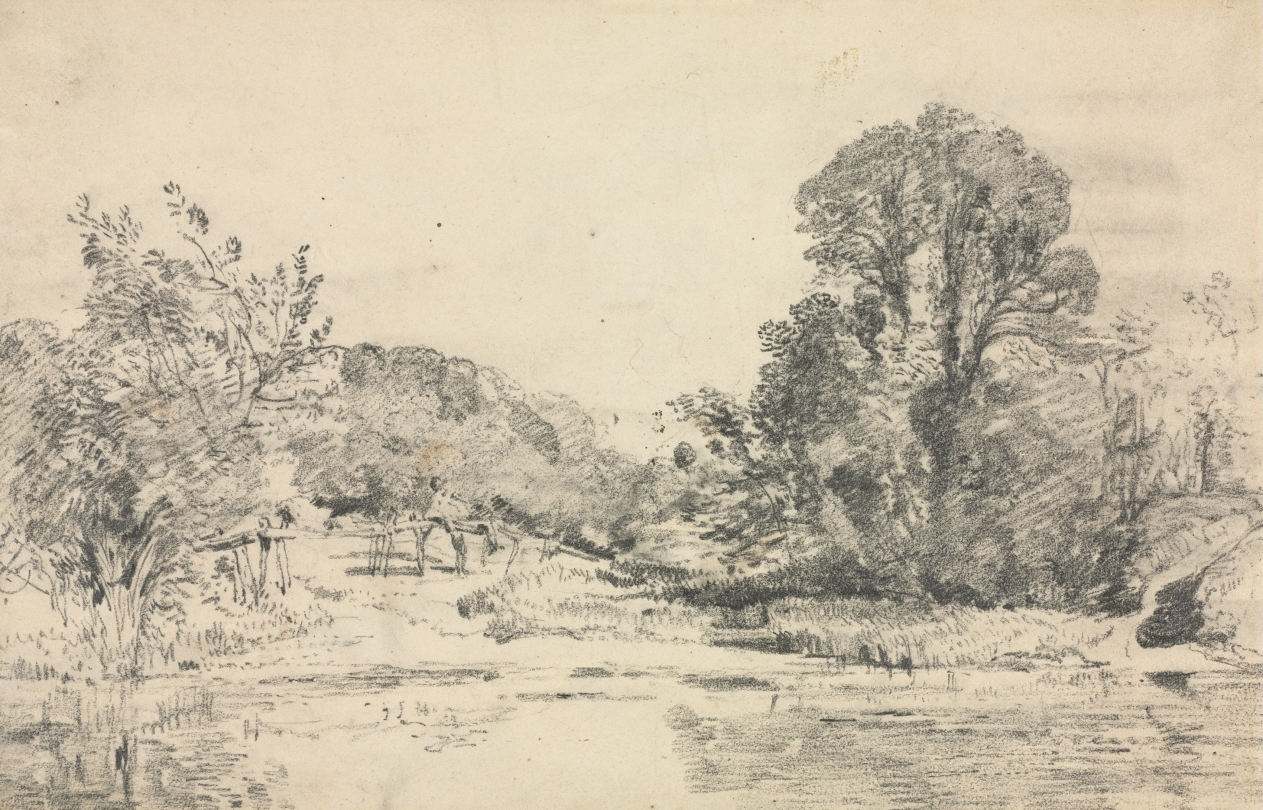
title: Landscape with Trees Surrounding a Pond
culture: England, 19th century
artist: John Constable (British, 1776–1837)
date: c. 1800–37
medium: graphite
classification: Drawing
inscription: Watermark: 1811